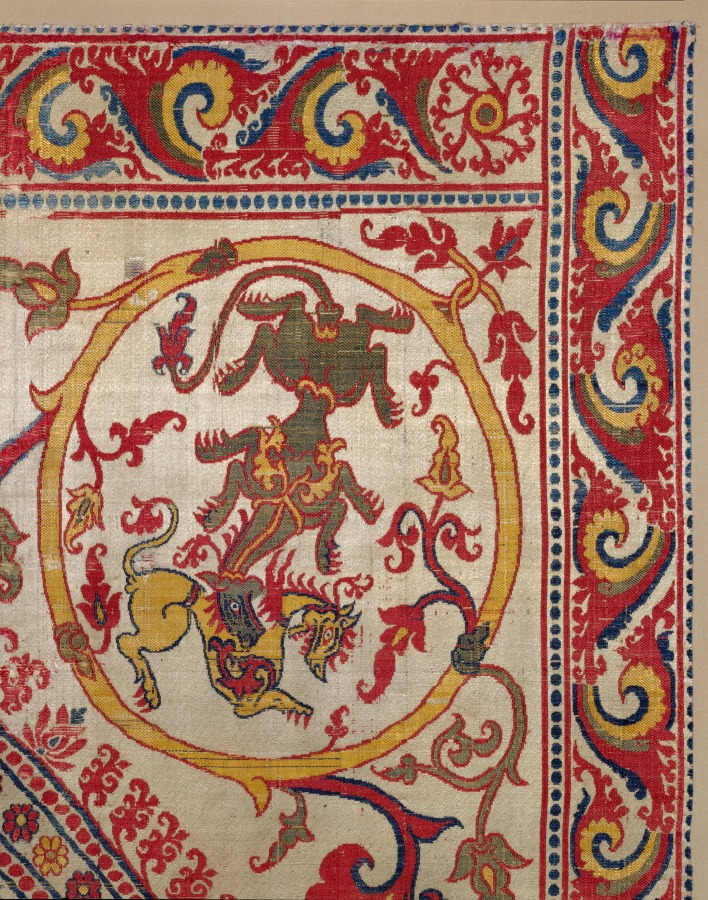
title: Lotus-blossom petal canopy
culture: Northern India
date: c. 1600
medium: silk: lampas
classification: Textile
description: The ceilings of sacred spaces throughout India were carved or painted with concentric circular lotus patterns; many also included textile canopies with the same designs. This exceptionally large example was woven in one complete section on a single loom. In India, the full-blown lotus flower bears solar connotations. It projects the radiance of a sacred or royal presence below. The motif of a dragon bearing down on a winged lion in each of the four corners indicates the designer’s recognition of a motif popular across Islamic Asia, from Turkey to Iran and Mughal India.